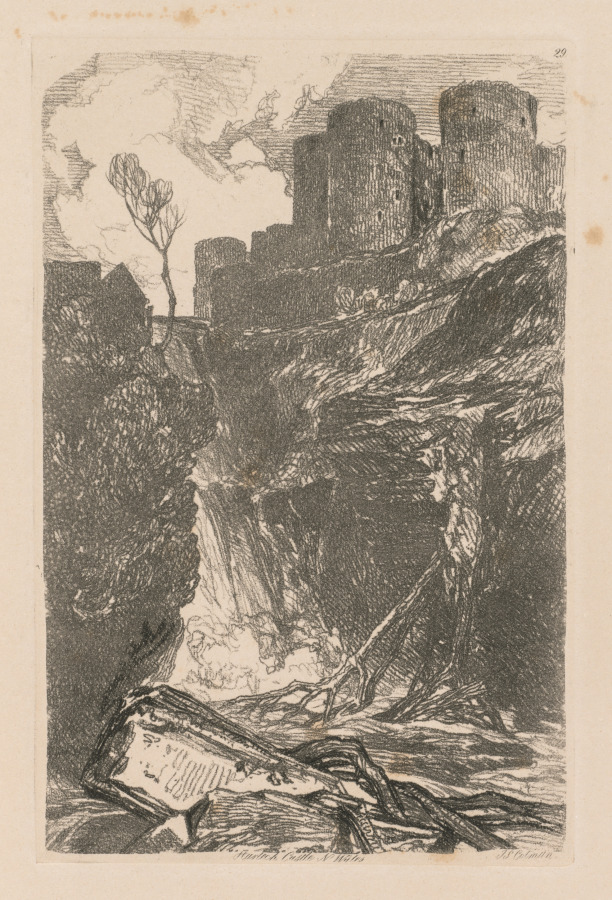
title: Liber Studiorum: Plate 29, Harlech Castle, N. Wales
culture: England, 19th century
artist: John Sell Cotman (British, 1782–1842)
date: 1838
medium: softground etching, from a bound volume containing 48 plates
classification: Bound Volume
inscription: In plate, within image, upper right: 29; in plate, below image: Harlech Castle, N. Wales JS Cotman